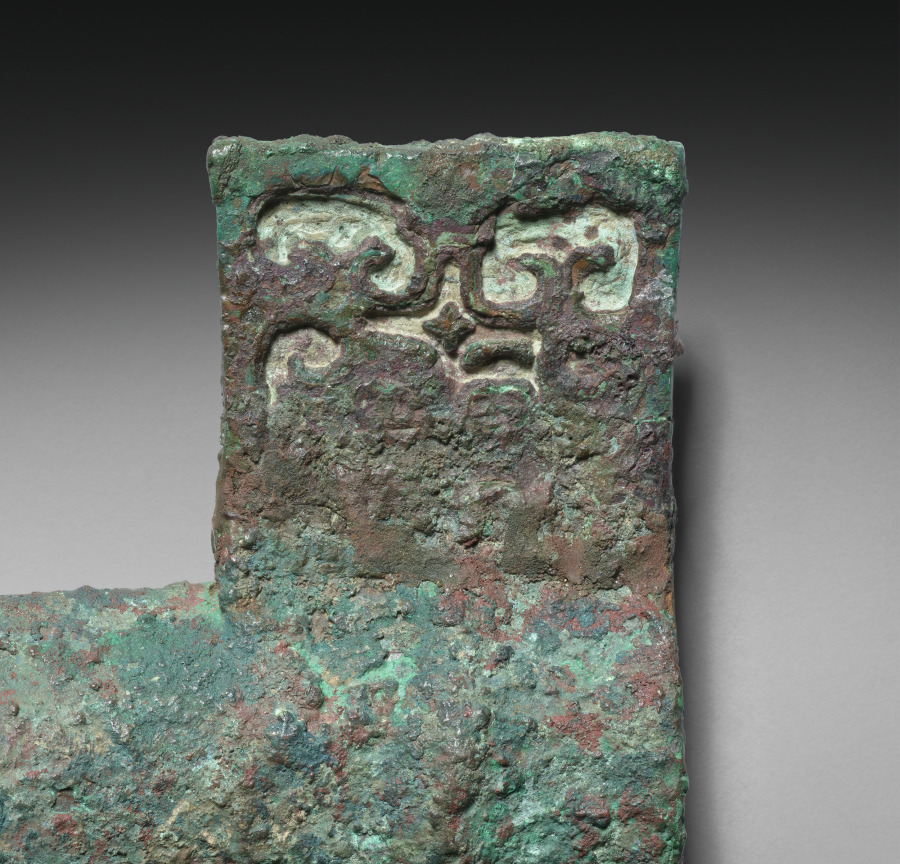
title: Axe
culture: China, Shang dynasty (c. 1600–c. 1046 BCE)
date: 1766–1045 BCE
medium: bronze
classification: Metalwork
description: The head of an owl with large eyes and ears, sitting above the blade of a halberd-axe, may have deterred evil and harm from its carrier. Whether such an axe was used in ritual or warfare is not clear.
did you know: A staff or pike would have attached to the blade via the socket below the owl's head.